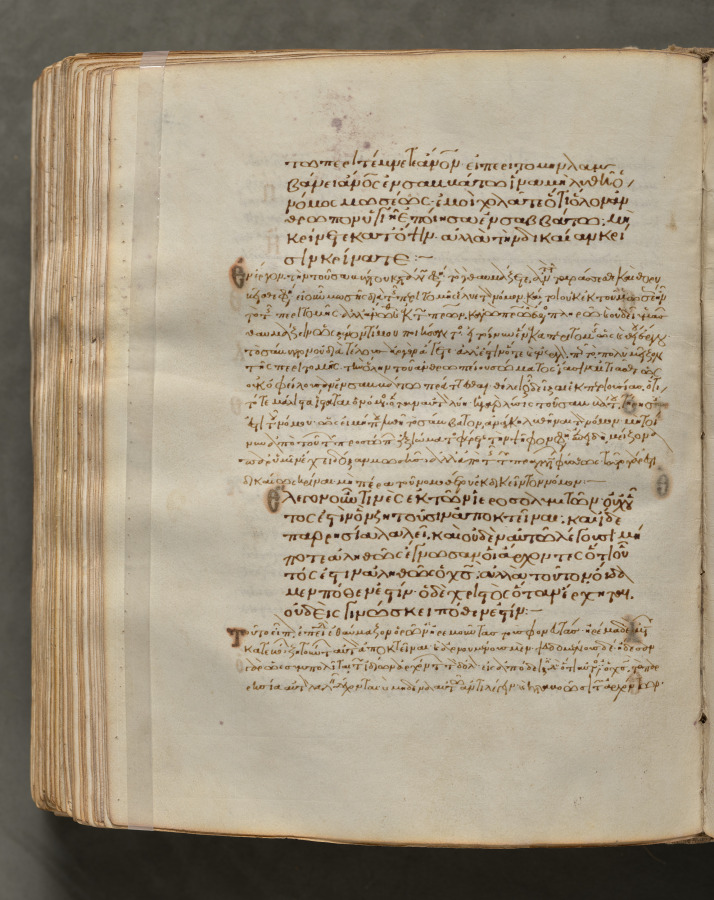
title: Text, folio 358 (verso), from a Gospel Book with Commentaries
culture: Byzantium, Constantinople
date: c. 1000–1100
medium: ink, tempera, and gold on vellum; leather binding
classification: Bound Volume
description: Each of the four gospels in this book opens on a page with brilliantly illuminated borders depicting the author of the text as well as birds—principally peacocks, symbols of the immortality of the soul—and fountains, representing the fountain of life and the salvation of the soul. This volume consists of 428 leaves with texts in Greek. Its level of sophistication suggests that it was probably written and decorated in a monastery in Constantinople.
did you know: Gospel books were carried in procession through Byzantine churches.